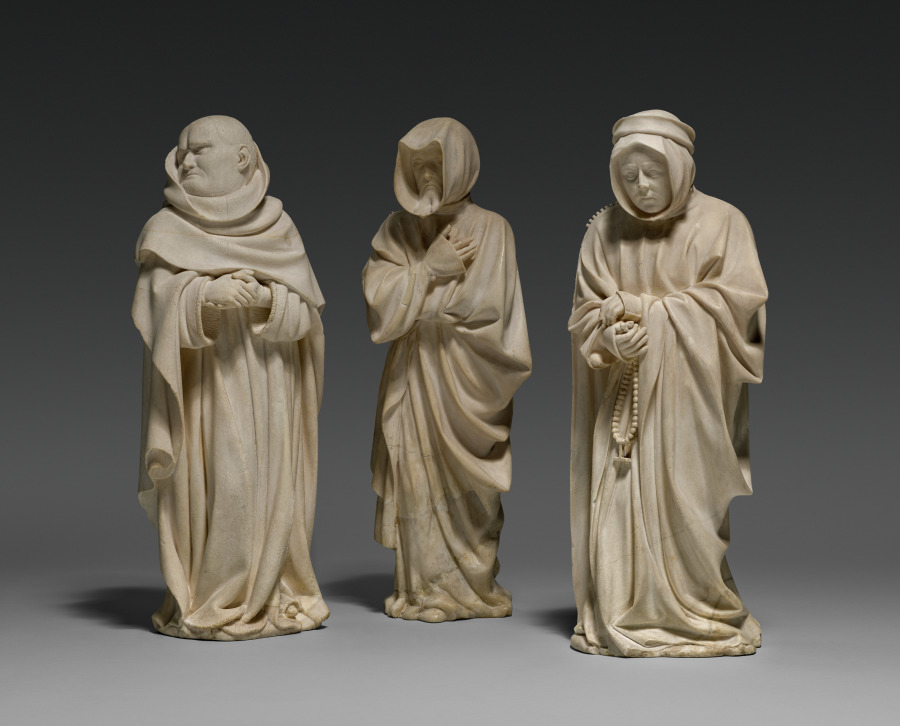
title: Mourner from the Tomb of Philip the Bold, Duke of Burgundy (1364–1404)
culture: Netherlands, active Dijon, 15th century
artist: Claus de Werve (Netherlandish, 1380–1439)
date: 1404–10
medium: vizille alabaster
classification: Sculpture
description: This figure comes from the tomb of Duke Philip the Bold from the church of Champmol near Dijon (Burgundy, France). Philip, who founded the monastery and designated it as his burial place, hired the best artists, many of whom came from the Netherlands. While the commission was given in 1381, the work was not completed until 1410, six years after the duke’s death. This mourner is unusual for the time because it is not carved as a static low relief on the pedestal of the tomb but interact with the viewers and their fellow procession members. The lifelike quality of the figure is due in large part to the alabaster. Its softness allowed artists to carve details into the material, and the transparent, milky white stone could also be polished to a high gloss.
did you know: The use of alabaster in the late Middle Ages began in the 1300s with court art in the circles of French kings, especially in the field of funerary sculpture.